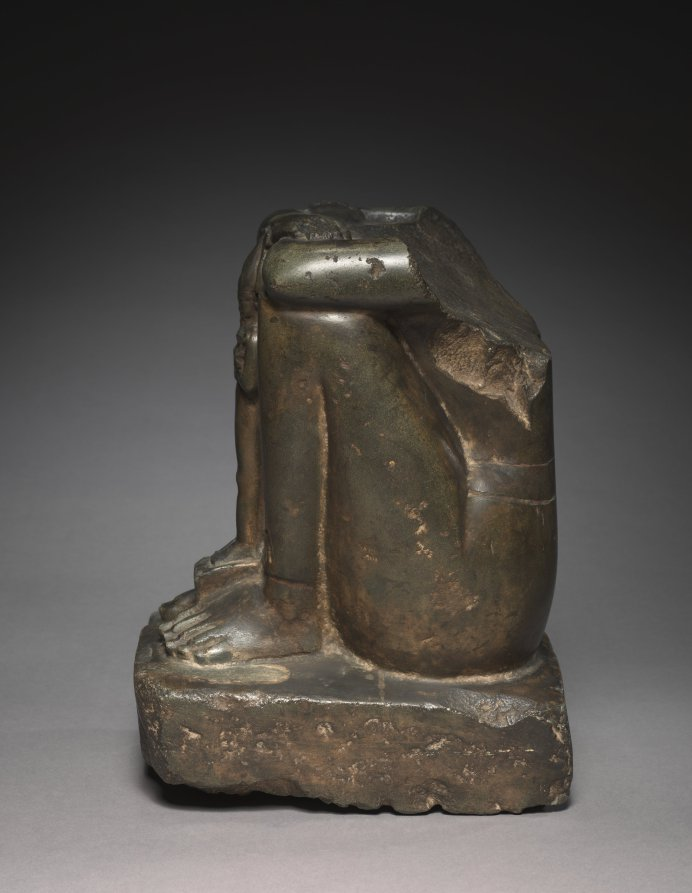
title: Block Statue of the Royal Acquaintance, Horwedja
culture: Egypt, Late period (715–332 BCE), Dynasty 26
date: 664–525 BCE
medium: graywacke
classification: Sculpture